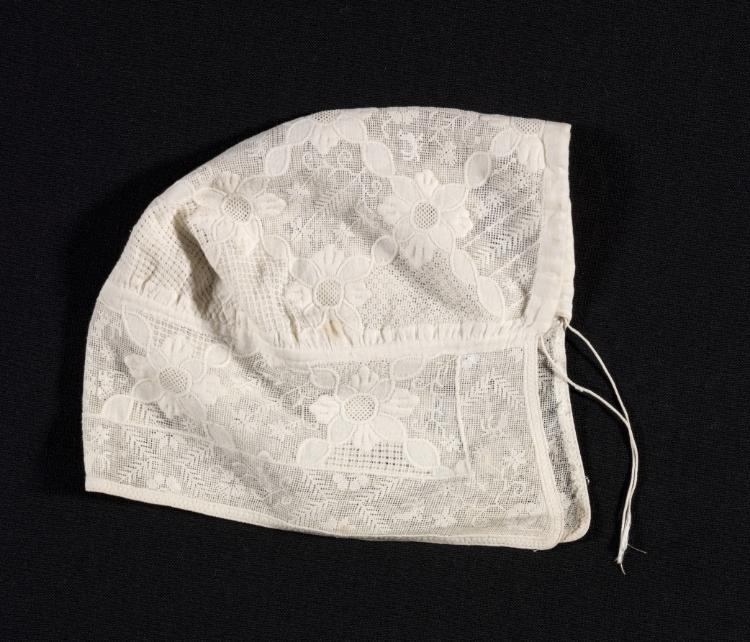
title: Cap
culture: Germany, 19th century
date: 1800s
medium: Plain weave linen: needle lace (drawnwork)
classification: Garment